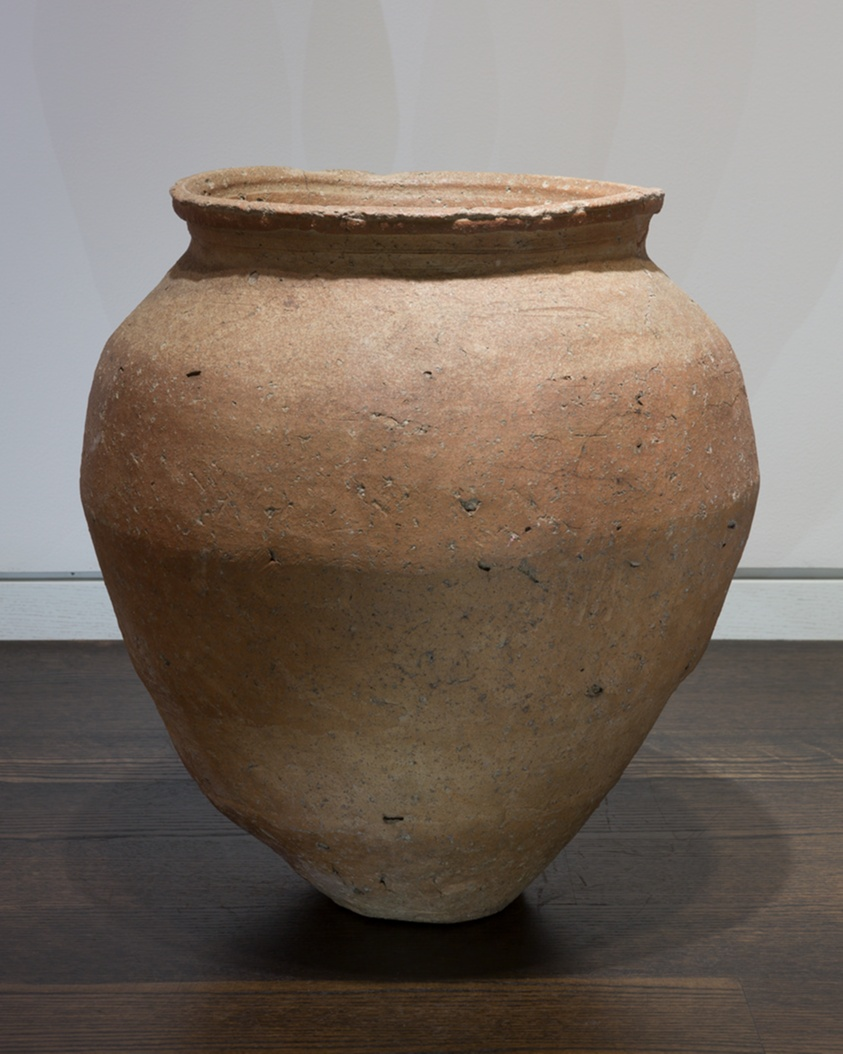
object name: Vessel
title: Shigaraki-Ware Jar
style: Japanese (culture or style)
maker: Japan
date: 14th century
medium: Stoneware with ash glaze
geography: Japan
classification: stoneware; ceramics; asian art; vessel